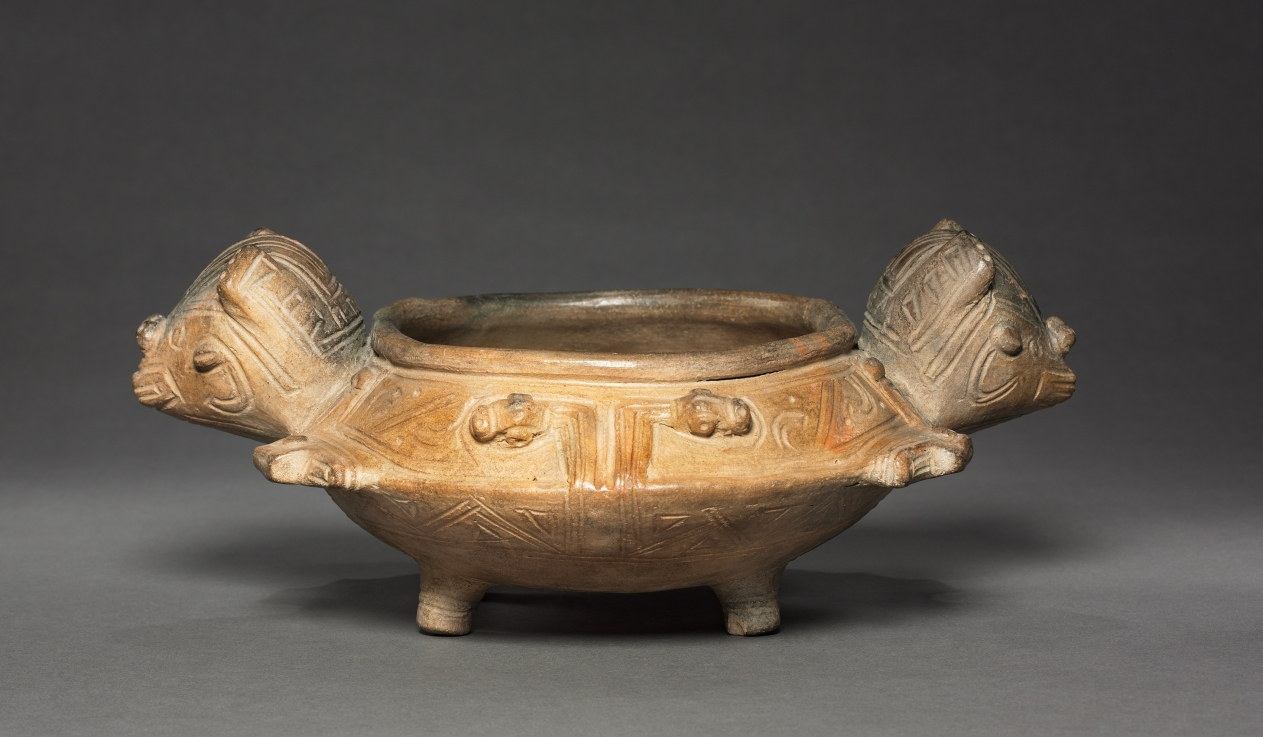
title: Double-Bat Bowl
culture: Colombia, Tairona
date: c. 900–1550 (thermoluminescence date, 810–1310)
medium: earthenware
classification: Ceramic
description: The archaeological Tairona civilization of mountainous northern Colombia is believed to be ancestral to the contemporary Kogi indigenous group. Ancient Tairona sites are terraced, and characterized by circular stone building foundations. The most famous form of Tairona art is gold jewelry, especially lost-wax cast figurines of chiefs, and anthropomorphic bats and birds. Tairona ceramics are less well known. This bowl has two protruding bat heads and four legs. The incurved sides of the bowl to either side of each head represents the bats' wings. The vessel's surface is decorated with raised serpents, as well as incised and impressed patterns.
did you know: The Tairona civilization lived in the mountains of northern Colombia.